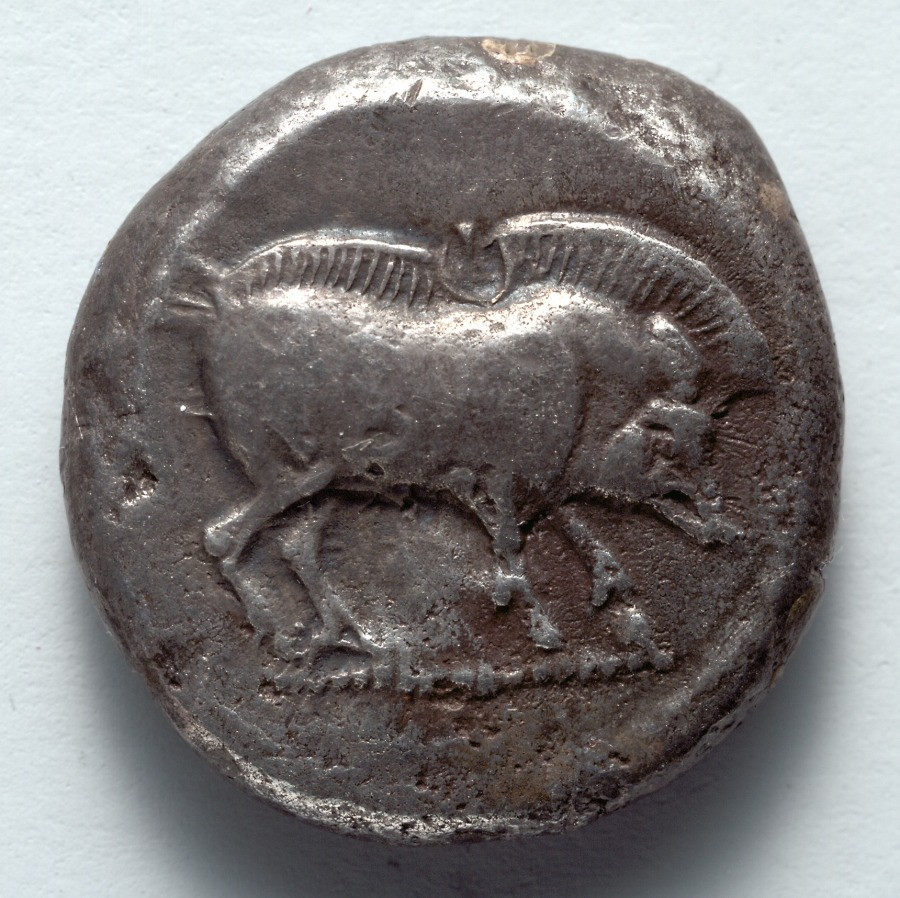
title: Stater: Boar (obverse); Tortoise (reverse)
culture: Greece, Lycia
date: 500–460 BCE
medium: silver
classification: Coins